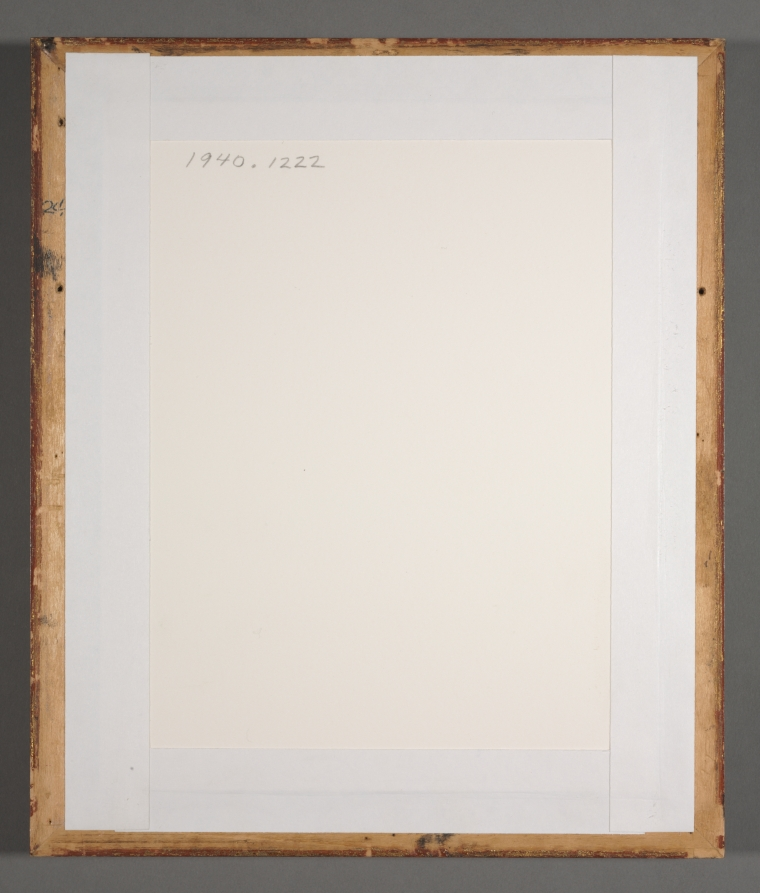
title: Portrait of Philippe de Croy, Duke of Aerschot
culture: Belgium, Flemish School, 19th century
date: 1800s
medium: watercolor on vellum in a later gilt-wood frame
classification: Portrait Miniature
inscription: inscribed: LE DUC / DARSECOT [annotated on reverse: LE DUC DARSCHOT]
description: Heir of an illustrious Flemish family and a member of the Order of the Golden Fleece, Philippe de Croy held the position of governor of Antwerp and governor-general of Flanders. As such, he repeatedly served the interests of the Habsburg emperor Charles V and King Philip II in the Spanish imperial armor. He is represented in this vellum miniature wearing the ceremonial parade armor befitting a great general. His blued, etched, and gilded armor is probably of Augsburg make, a center many of the Habsburgs favored for its production of deluxe armor.